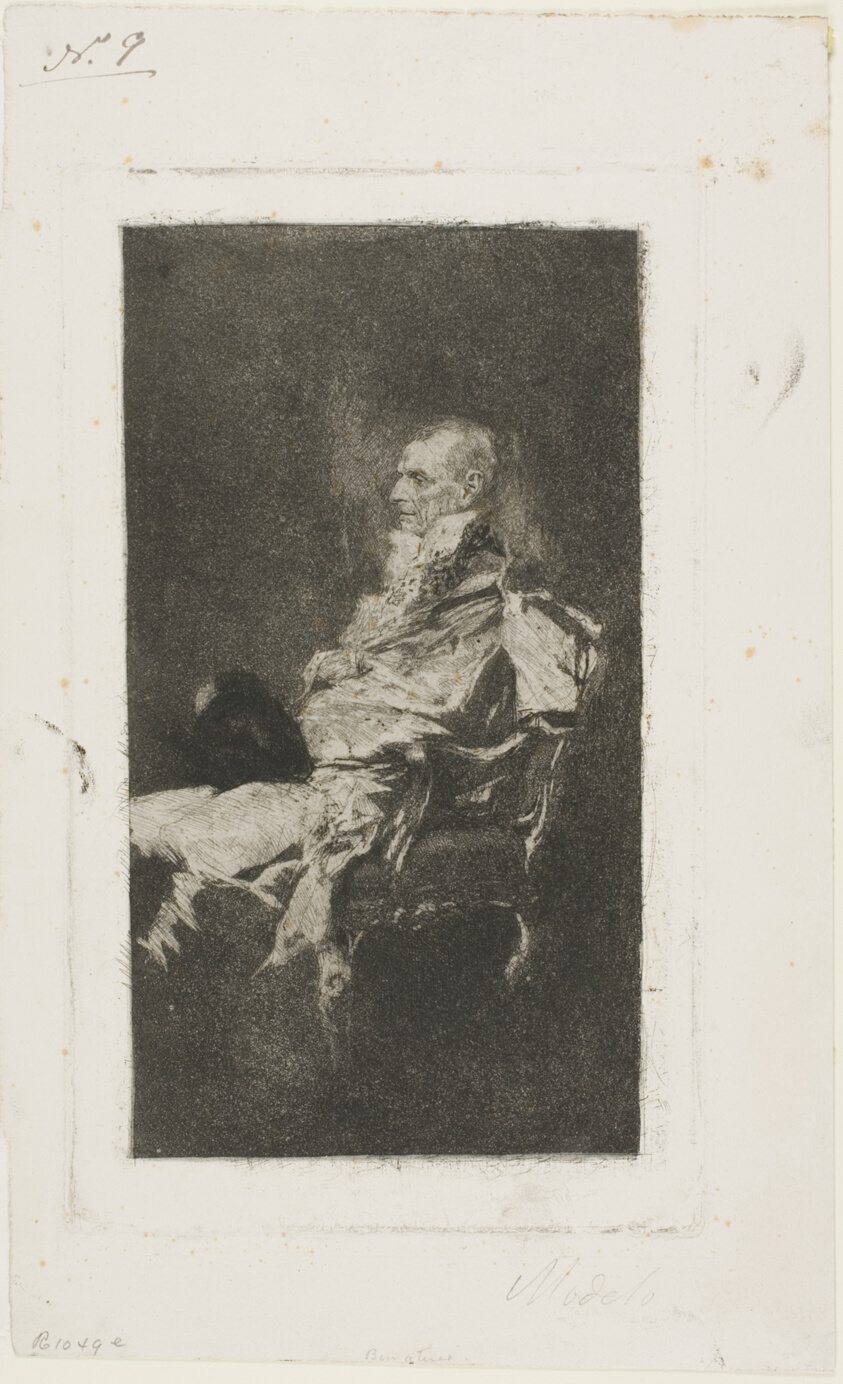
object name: Print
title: Diplomat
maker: Mariano José María Bernardo Fortuny y Carbó; Spanish, 1838-1874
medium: Etching on paper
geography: Spain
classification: etching; print; prints and drawing